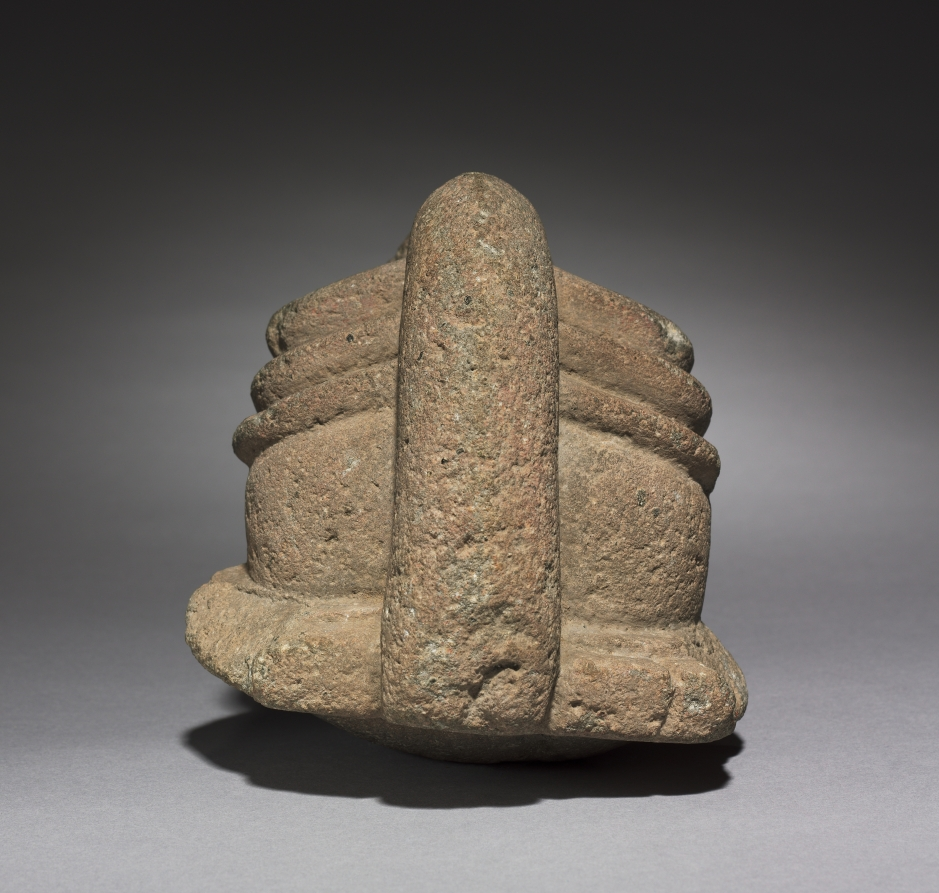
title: Ballgame Stone Head (Hacha)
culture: Mesoamerica, Classic Veracruz style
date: 450–550 CE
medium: gray volcanic stone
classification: Sculpture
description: Little can be said about this head’s identity and meaning, although the deep, dramatic furrows that line the face suggest age and the crest that curves across the top of the head has been compared to that of a bird. Such heads were one element of the regalia used in an ancient ballgame associated with complex mythology and equally elaborate art production on Mexico’s Gulf Coast, in present-day Veracruz.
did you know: This head’s identity is unknown but the deep furrows on the face suggest age.